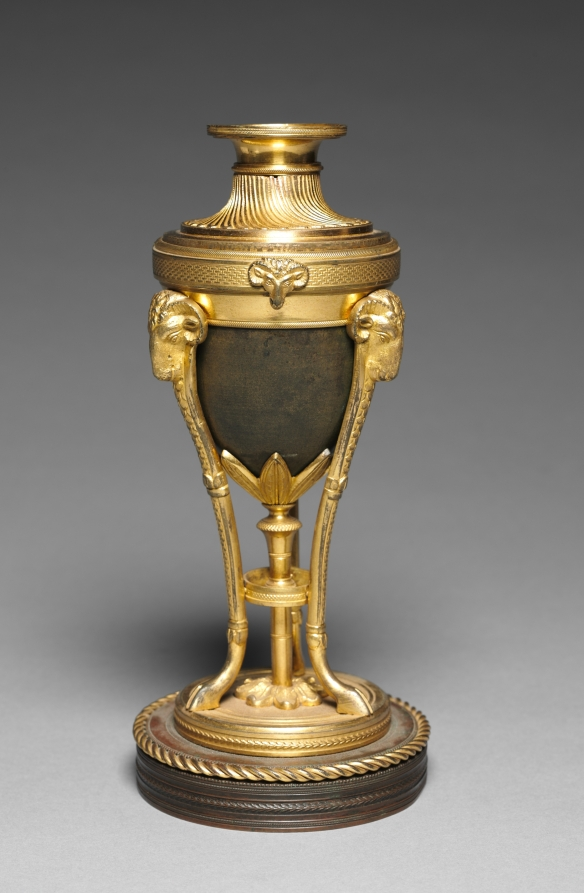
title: Urn Convertible into Candle Stick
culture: England, late 18th century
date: late 1700s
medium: dark bronze, mounts in ormolu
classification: Furniture and woodwork